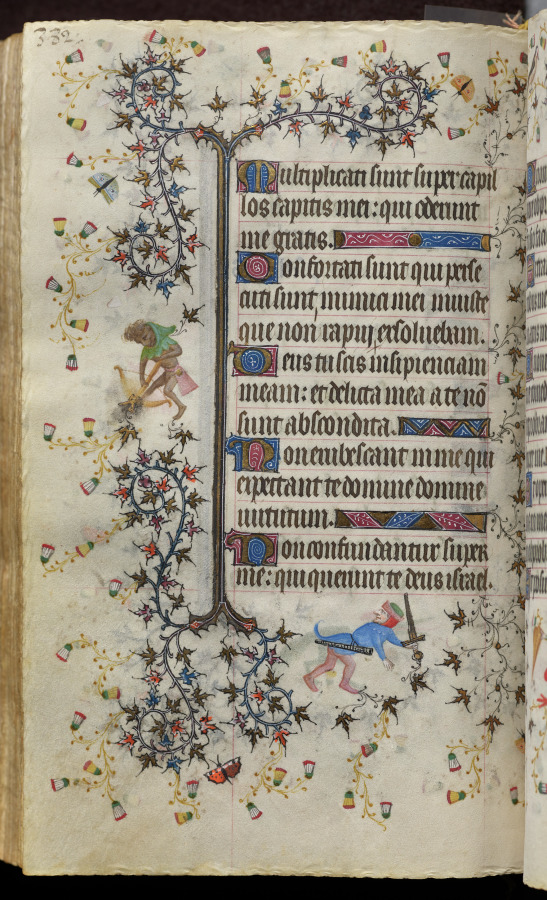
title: Hours of Charles the Noble, King of Navarre (1361-1425): fol. 186v, Text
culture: France, Paris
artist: Master of the Brussels Initials and Associates (French)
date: c. 1405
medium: ink, tempera, and gold on vellum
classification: Bound Volume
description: This precious volume was obviously highly prized by its owner, the French-born King of Navarre, who had his coat of arms painted on no less than twenty folios. Rather than directly commissioning this manuscript from a specific workshop, it seems that Charles the Noble acquired his book of hours -- perhaps ready-made for the luxury market -- while on a trip to Paris in 1404-05. A collaborative effort, six painting styles are evidenced within the pages of this codex, those of two Italians, two Frenchmen, and two Netherlanders. The painter who was responsible for the planning and decoration of the book, and who produced seventeen of the large miniatures, was a Bolognese artist known as the Master of the Brussels Initials. His principal assistant, responsible for most of the borders, was a Florentine who signed his name "Zecho" da Firenze on folio 208 verso.